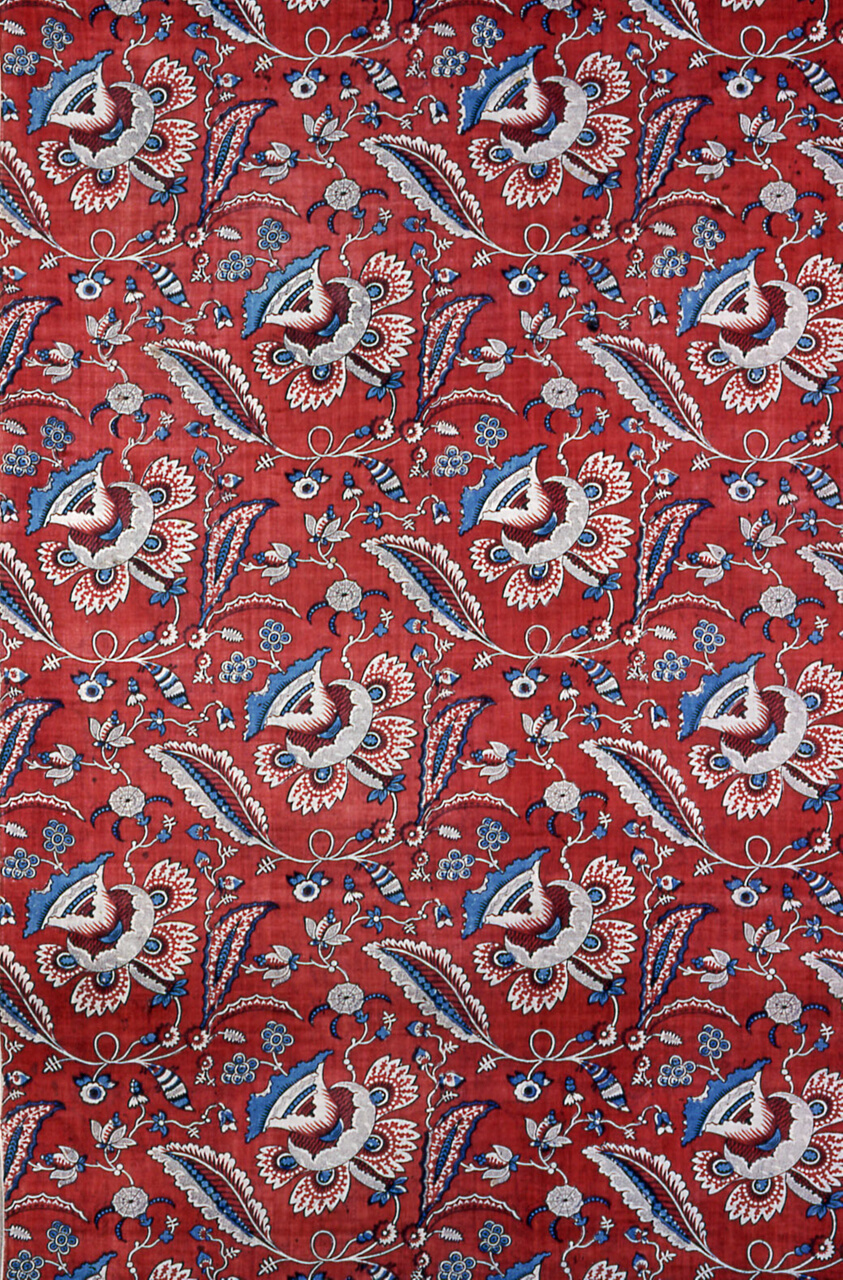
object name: Textile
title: Panel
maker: France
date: 1750/1800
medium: Cotton, balanced plain weave, block printed; glazed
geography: France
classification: textile; weaving - printed; weaving; printed textile